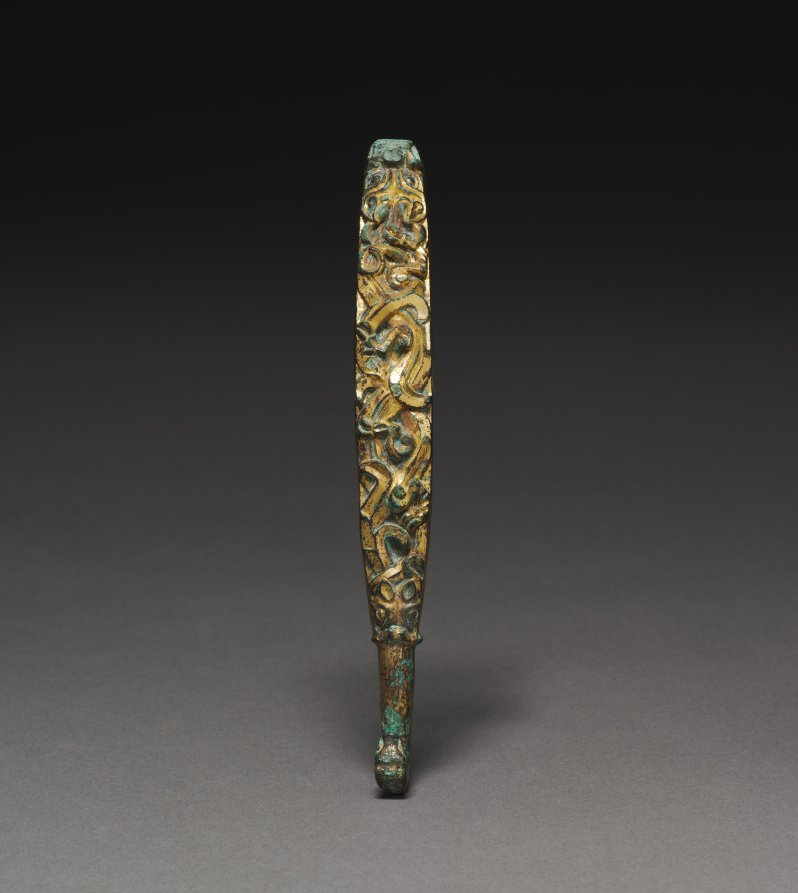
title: Belt Hook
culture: China, Warring States period (475–221 BCE)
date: 475–221 BCE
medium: front: bronze inlaid with gold and turquoise; back: gilt bronze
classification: Metalwork